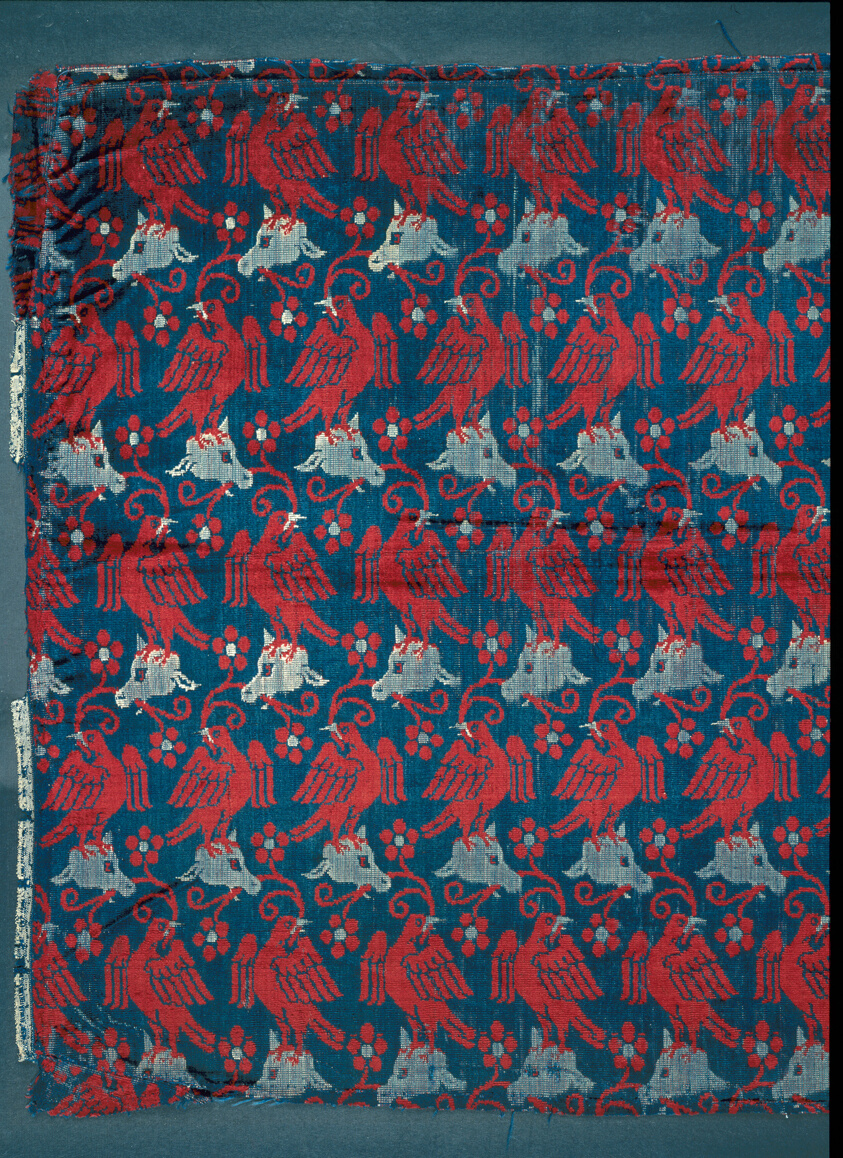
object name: Textile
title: Panel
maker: Italy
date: 1401/25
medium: Silk, plain weave with three-color supplementary pile warps forming cut solid velvet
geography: Italy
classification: textile; weaving - velvet